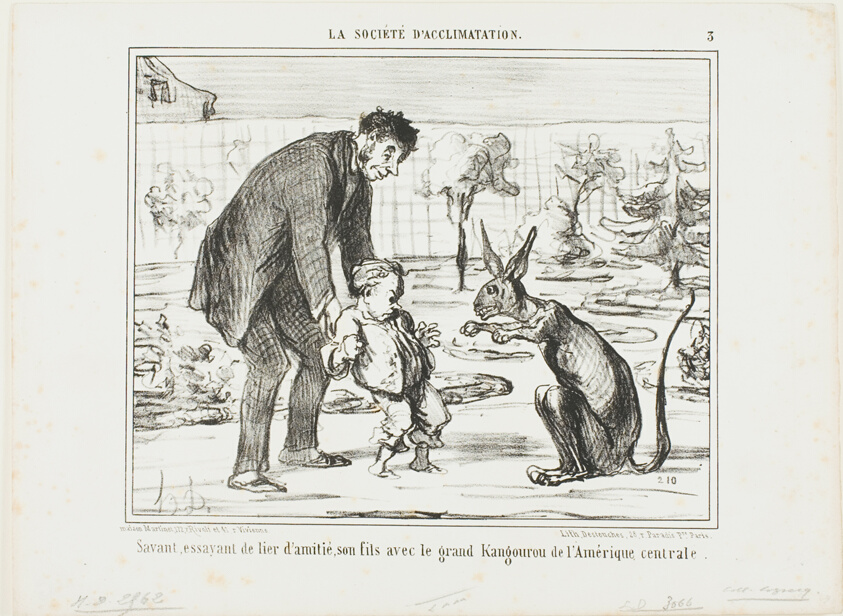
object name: Print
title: A Scientist Trying to Befriend His Son with a Great Kangaroo from Central America, plate 3 from La Société D'acclimatation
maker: Honoré Victorin Daumier; French, 1808-1879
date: 1858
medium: Lithograph in black on white wove paper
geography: France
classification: lithograph; print; prints and drawing